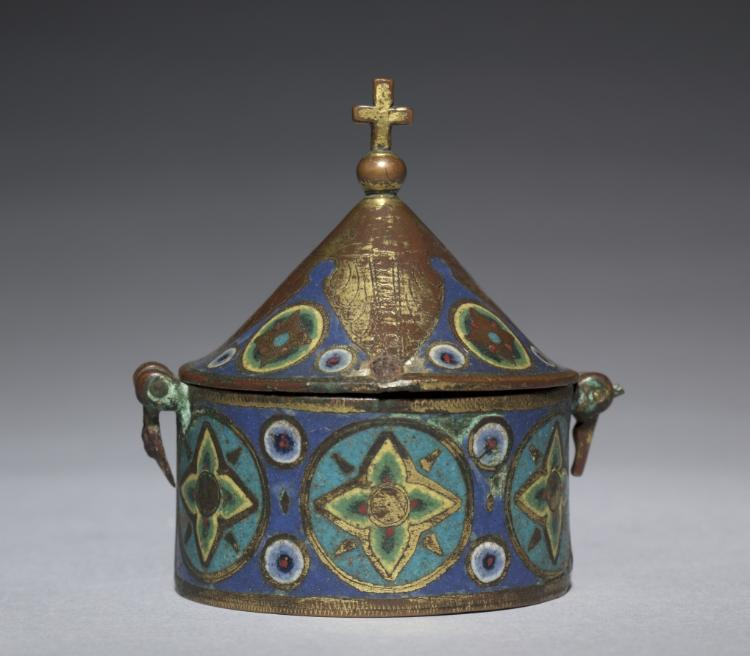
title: Pyx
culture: France, Limousin, Limoges, Gothic period, mid-13th century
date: c. 1250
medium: gilded copper, champlevé enamel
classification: Enamel